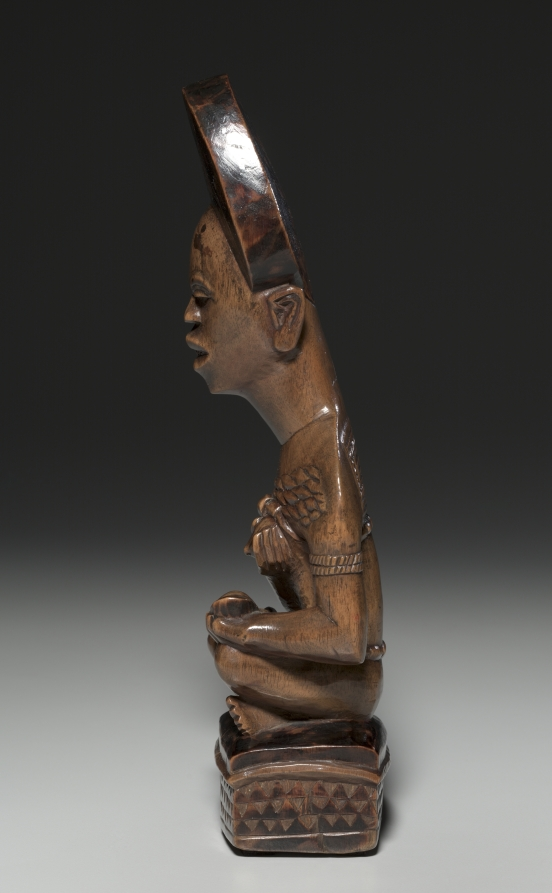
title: Woman and Child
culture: Africa, Central Africa, Democratic Republic of Congo, Yombe-style carver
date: mid- to late 1800s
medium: Wood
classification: Sculpture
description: This mother-and-child figure was probably part of a cult concerned with the treatment of infertility. Both her jewelry and her seated pose indicate that the woman occupied a high rank in her community. Her miter-shaped hairstyle, chiseled teeth, and raised body scars--considered to be marks of beauty and perfection--signal that the woman incarnates the founding ancestor of a kinship group.